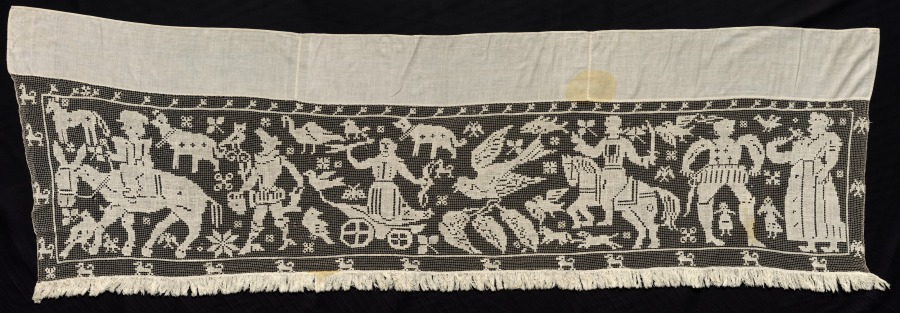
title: Border with Mounted and Standing Figures, Chariots, and Animals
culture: Spain ?, 1800s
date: 1800s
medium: Bleached linen (est.): needle lace, filet/lacis (knotted ground and darned in two directions)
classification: Lace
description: Animals viewed in profile, some with their legs raised, indicate movement, such as a parade or procession. The human figures are also shown in profile, with the exception of the central figure riding a chariot, who is shown frontally. There is one figure riding a donkey, with another on horseback, holding a sword. On the far right, a man and woman appear engaged in conversation. Meanwhile, various animals fill the space defying all rules of perspective, with the bird in the center appearing larger than some of the humans.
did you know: The word lace derives from the Latin laqueus, meaning noose.